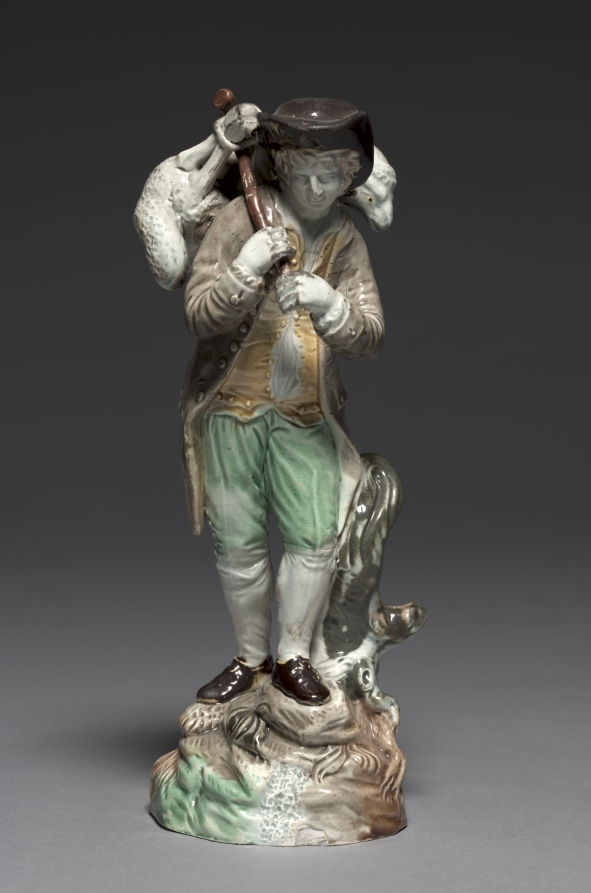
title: The Lost Sheep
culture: England, Staffordshire, 18th century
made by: Staffordshire Factory (British)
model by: John Voyez (French)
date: c. 1770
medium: lead glazed earthenware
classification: Ceramic